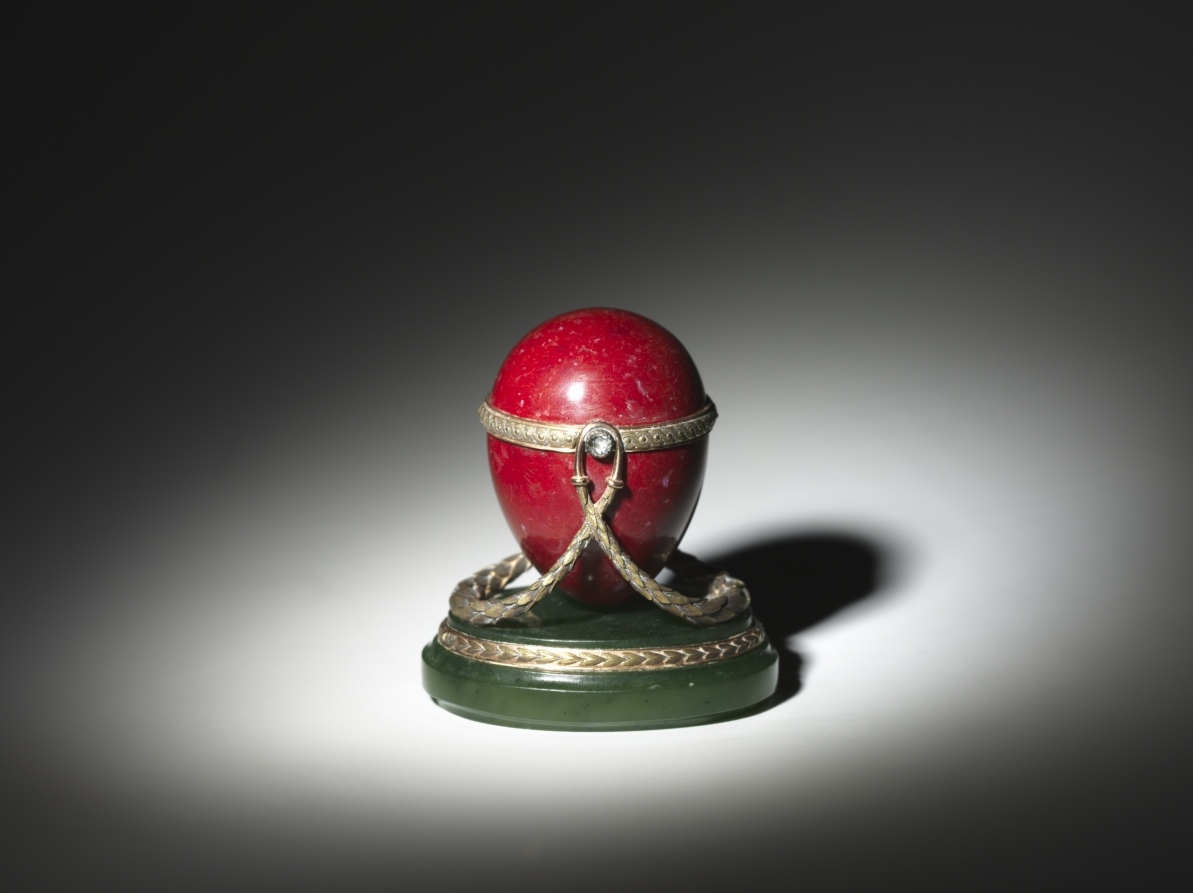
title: Hand Seal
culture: Russia, St. Petersburg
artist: firm of Peter Carl Fabergé (Russian, 1846–1920)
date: after 1903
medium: purpurine mounted in gold, jade, diamonds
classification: Miscellaneous